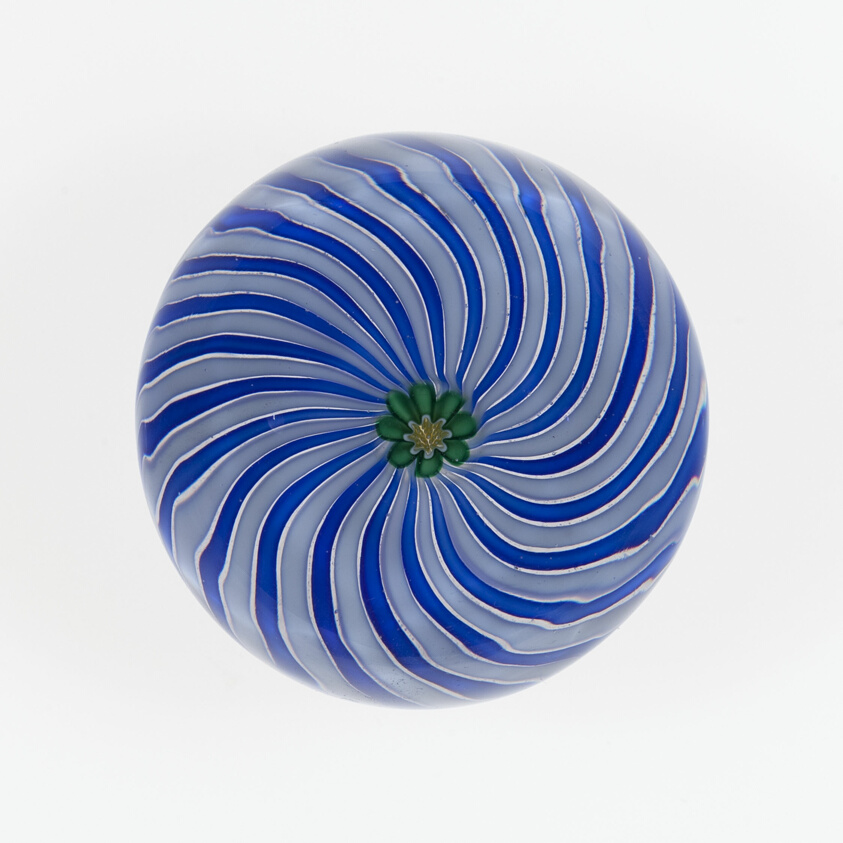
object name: Glass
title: Paperweight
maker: Clichy Glassworks (Cristalleries de Clichy); Clichy, France, 1837-1885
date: c. 1845–60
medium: Glass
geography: Clichy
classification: paperweight; glass